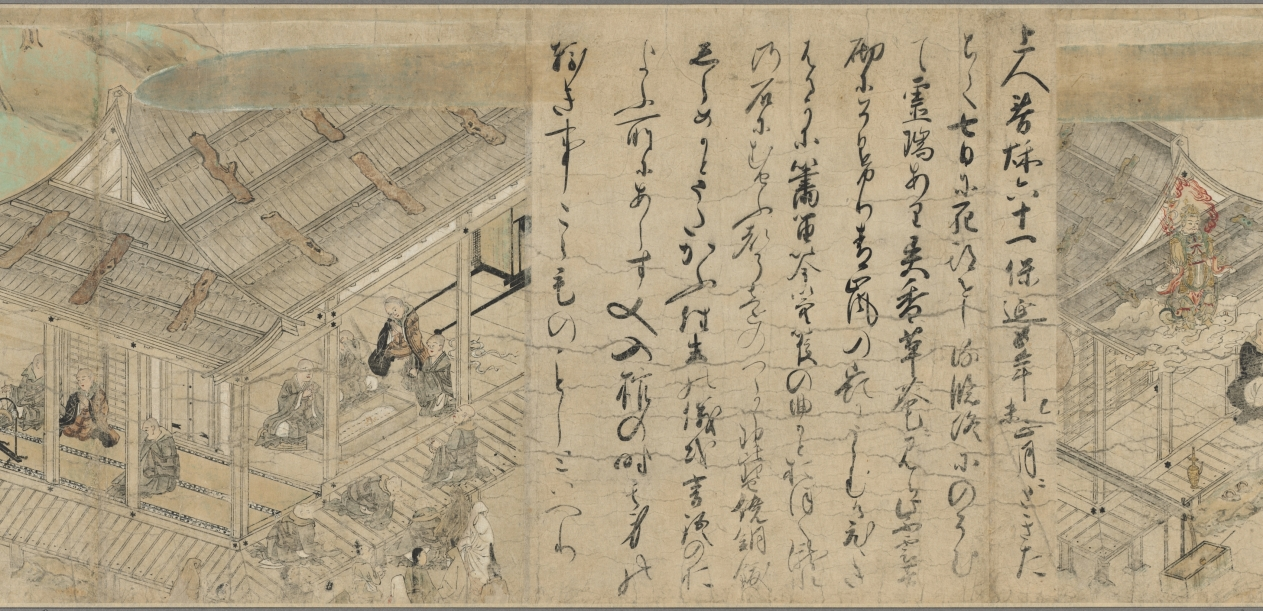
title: The Illustrated Miraculous Origins of the Yūzū Nenbutsu School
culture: Japan, Kamakura period (1185–1333)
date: early 1300s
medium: Handscroll; ink, color, and gold on paper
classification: Painting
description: This painting is the second of a set of two illustrated handscrolls. The first scroll depicts the biography of the Japanese Buddhist monk Ryōnin. This scroll begins with scenes of Ryōnin’s death and relates episodes illustrating the efficacy of following his teachings. Ryōnin asserted the total interconnectedness of all things and the spiritual benefit of chanting the name of the Buddha Amida for one another.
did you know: The other scroll from this two-scroll set belongs to the Art Institute of Chicago.